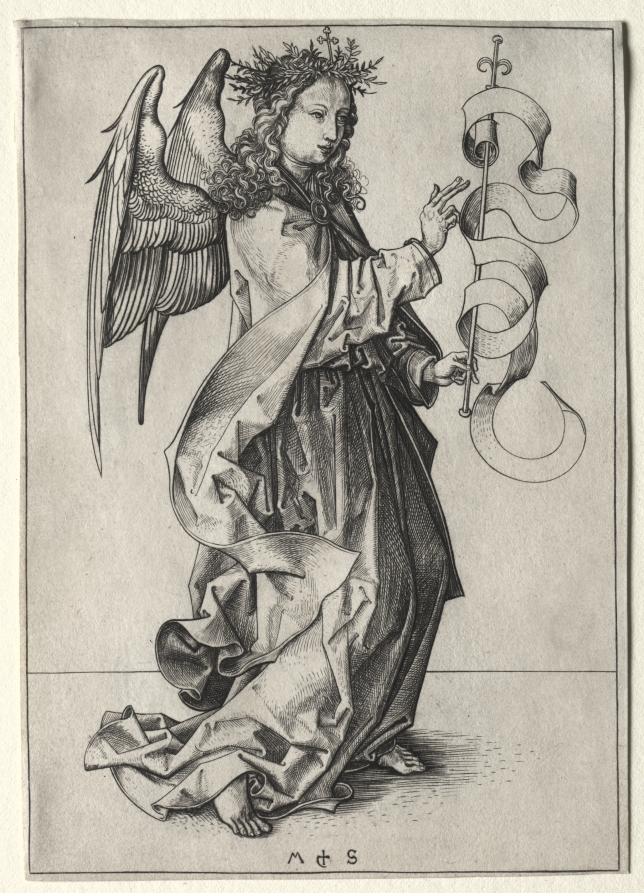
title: The Angel of the Annunciation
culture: Germany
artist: Martin Schongauer (German, c. 1450–1491)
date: c. 1470–75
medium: engraving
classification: Print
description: This engraving is half of a two-print scene depicting the Annunciation to the Virgin, when the angel Gabriel told Mary she would miraculously give birth to the Son of God. Presumably buyers could purchase the prints separately, although Schongauer probably hoped people would want to collect them both. His engraved lines masterfully emulate different natural qualities and textures, for example the spiraling locks of hair and the angel’s wings.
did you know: The sculptor Riemenschneider traveled to Strasbourg and became acquainted with the works of the engraver Martin Schongauer.